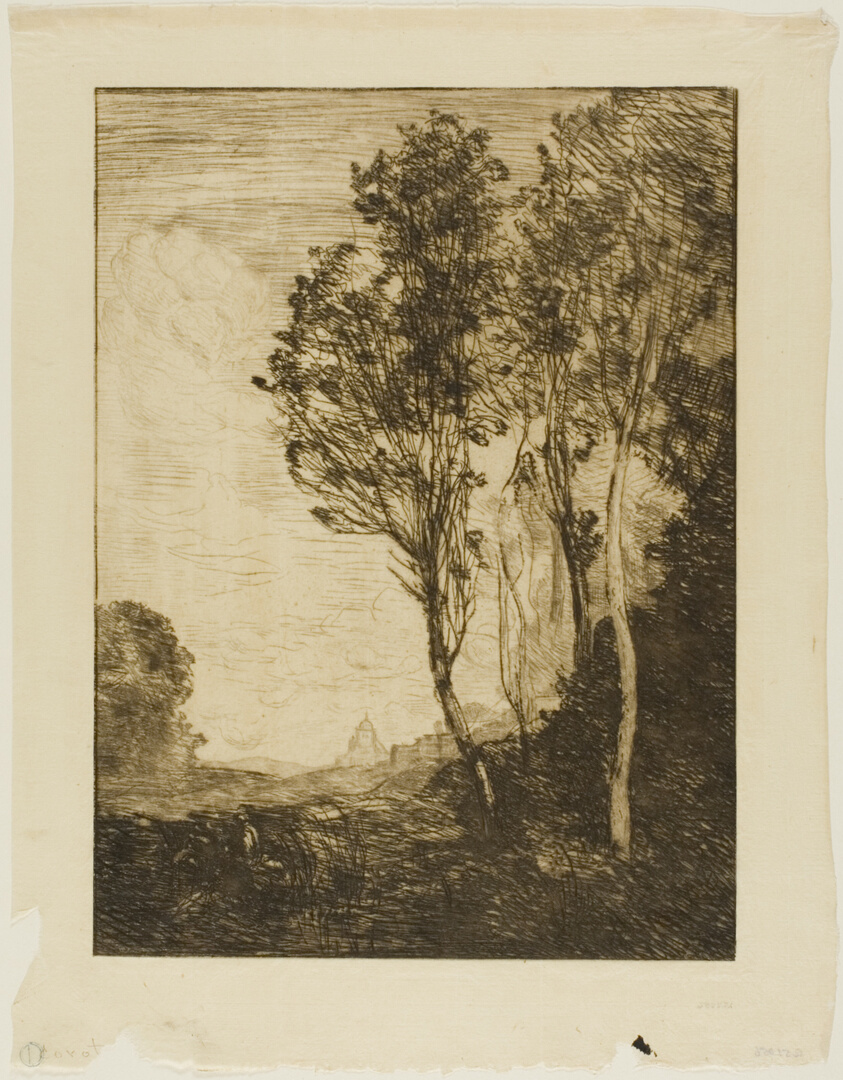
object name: Print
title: Remembrance of Italy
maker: Jean-Baptiste-Camille Corot; French, 1796-1875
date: 1866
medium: Etching on cream Japanese paper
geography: France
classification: etching; print; prints and drawing